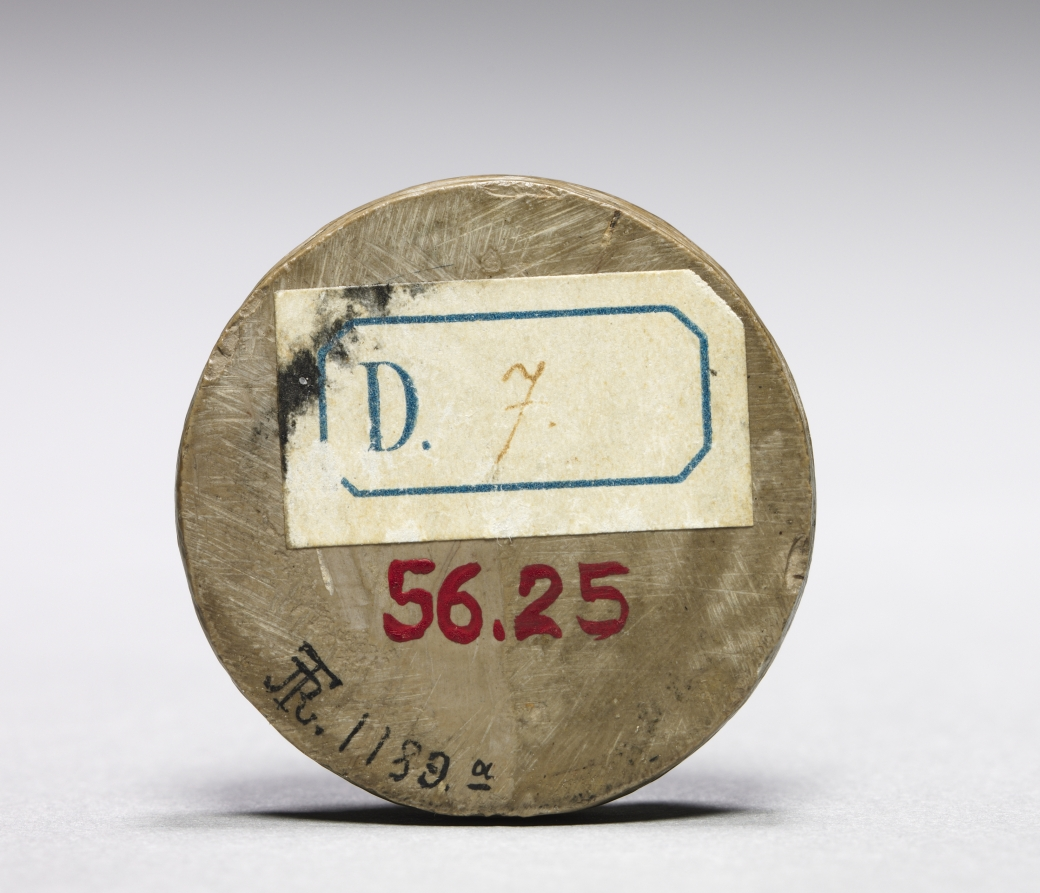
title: Model for the Obverse of the Medal of Son of Martin III Geuder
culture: Germany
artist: Matthes Gebel (German, c. 1500–1574)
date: c. 1535–1540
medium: Solnhofen limestone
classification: Sculpture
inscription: inscription: Remedium Inivkiae / sic / Contemptus.